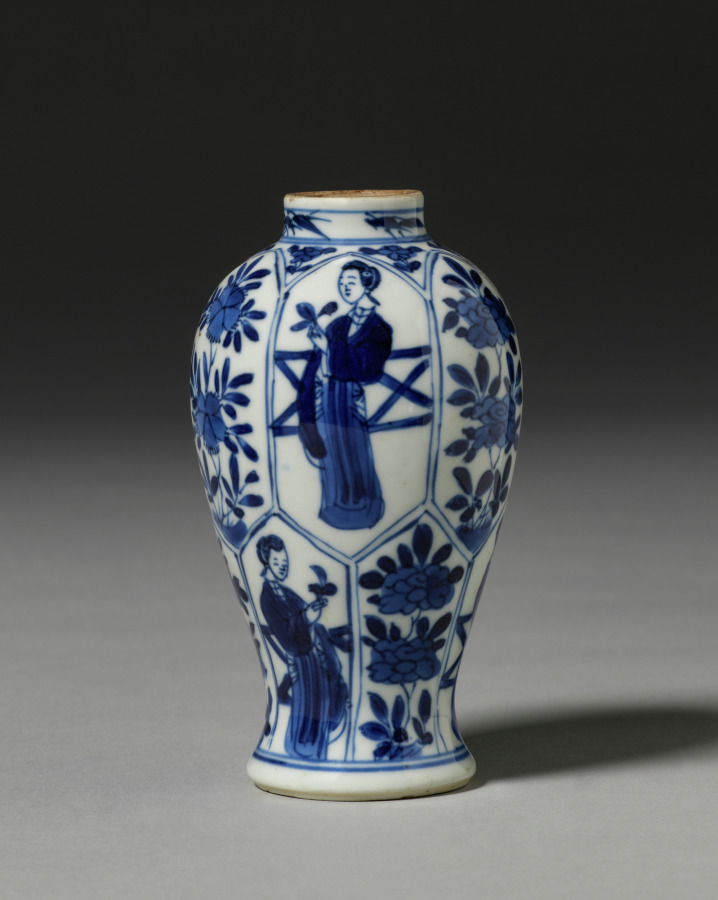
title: Jar with Cover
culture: China, Qing dynasty (1644-1911)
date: 19th Century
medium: porcelain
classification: Ceramic